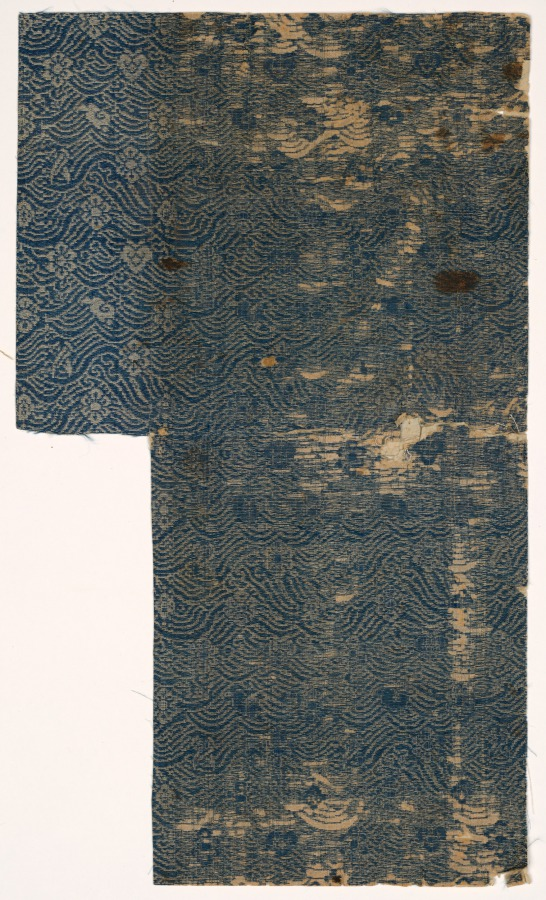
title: Textile Book Cover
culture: Japan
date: 1800s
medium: silk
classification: Textile